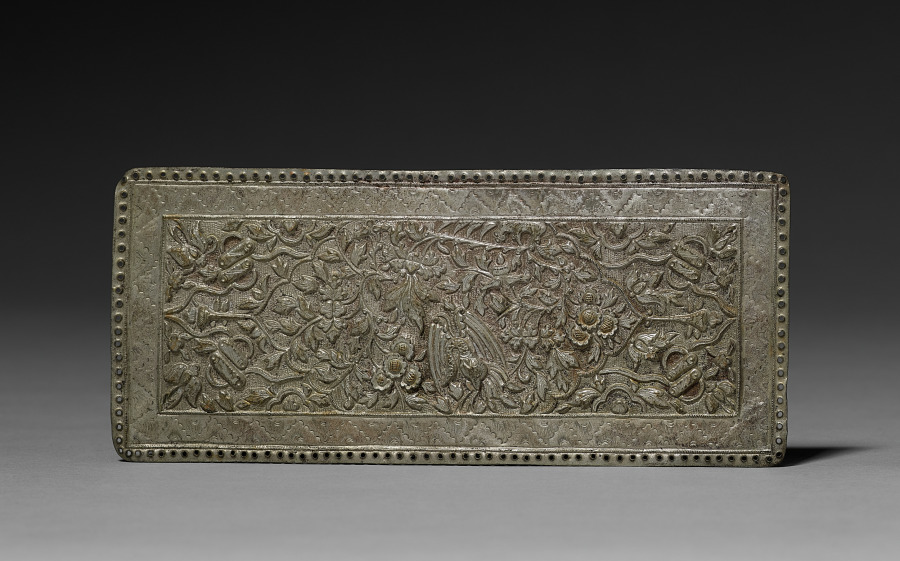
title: Pillow-end Plate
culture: Malaysia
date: 1800s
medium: white metal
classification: Metalwork